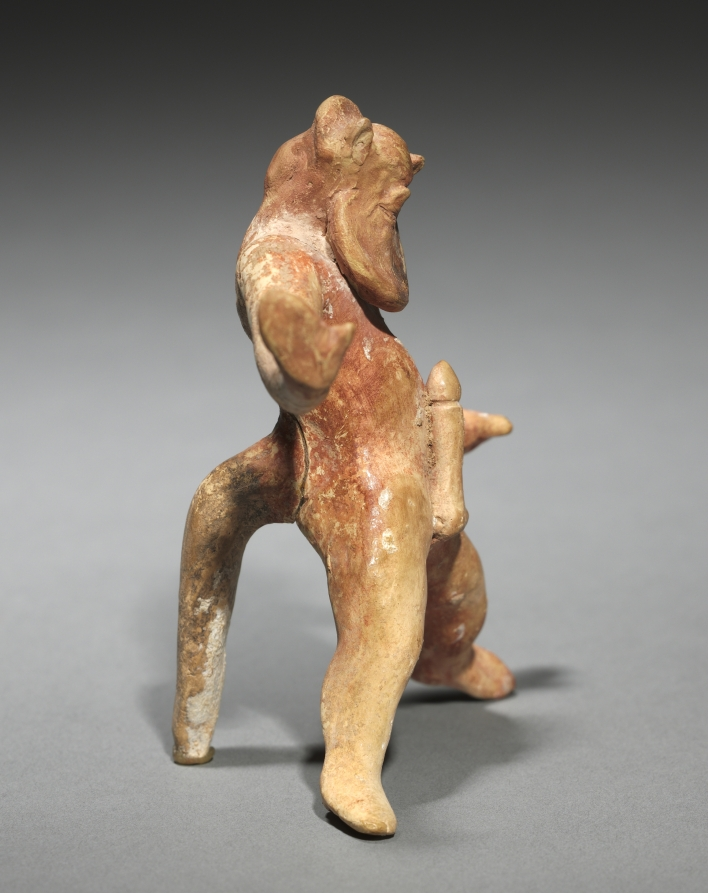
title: Dancing Satyr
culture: Greece, Boeotia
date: 500–475 BCE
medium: painted terracotta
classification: Sculpture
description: Part man and part beast, satyrs were mythical woodland creatures. In art, they were depicted with the ears and tail of a goat or horse, sometimes with hooves, and in a high state of sexual arousal. Satyrs often accompanied Dionysus, the god of wine, in his drinking bouts and other escapades. These three probably once decorated the rim of a large punch-bowl–shaped vessel for serving wine.